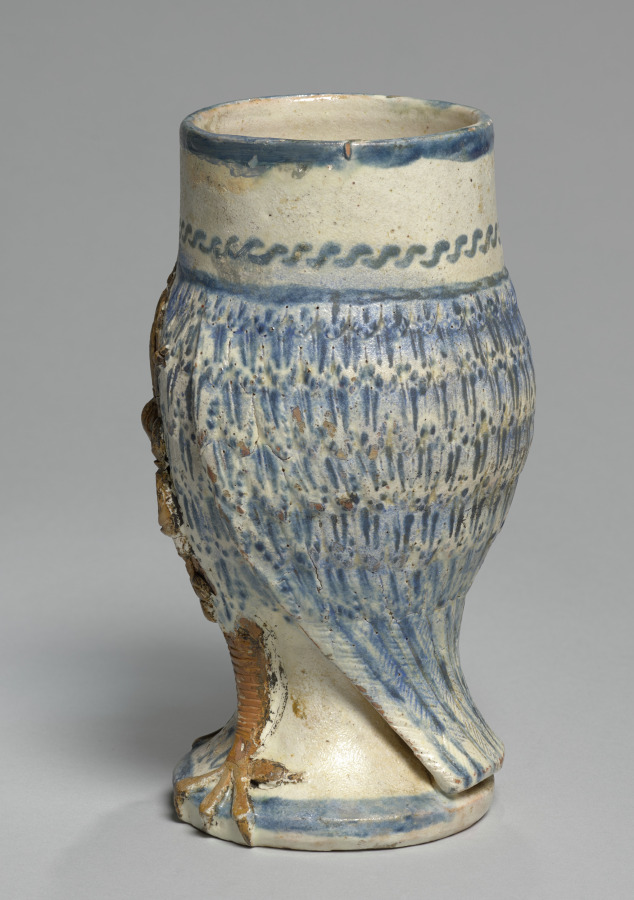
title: Owl (body)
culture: Southern Germany, 16th century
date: 1540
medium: faience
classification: Ceramic